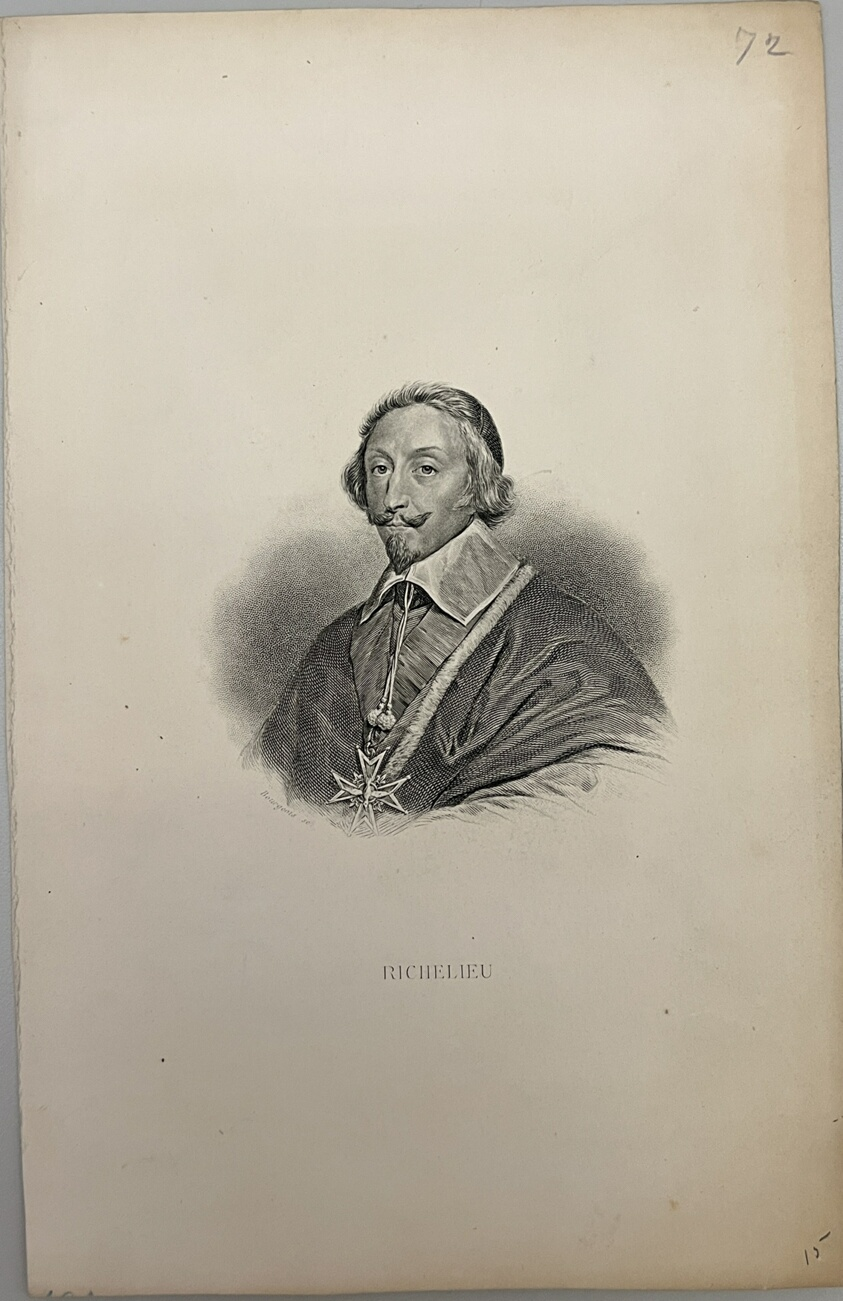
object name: Print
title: Richelieu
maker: Bourgeois (French, 19th century)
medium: Steel engraving on paper with text pasted on verso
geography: France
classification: reproduction; print; prints and drawing